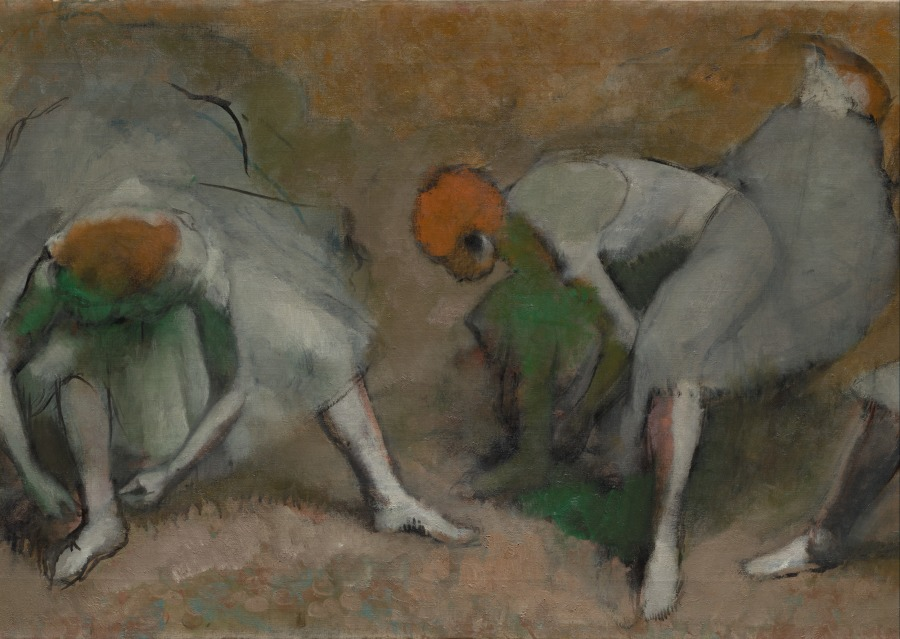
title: Frieze of Dancers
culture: France, 19th century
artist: Edgar Degas (French, 1834–1917)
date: c. 1895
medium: oil on fabric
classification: Painting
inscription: Signed in lower right: Degas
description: This painting may depict a single dancer seen from four different viewpoints. The young woman is placed in an undefined setting, surrounded by mere wisps of color, applied so spontaneously that the paint ran and dripped. Degas even added the circles in the foreground with his thumb. Such audacity, while acceptable in a small sketch, must have shocked the artist's contemporaries when presented on a six-foot canvas. Equally radical is the idea of combining multiple views of a single figure. Degas's unusual presentation may have been inspired by the photographs of Eadweard Muybridge (1830-1904)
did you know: The ballet is a subject Degas returned to again and again over the course of his career. Rather than public performances, he often depicted dancers behind the curtain, practicing, waiting, or, as in this painting, lacing up their shoes.